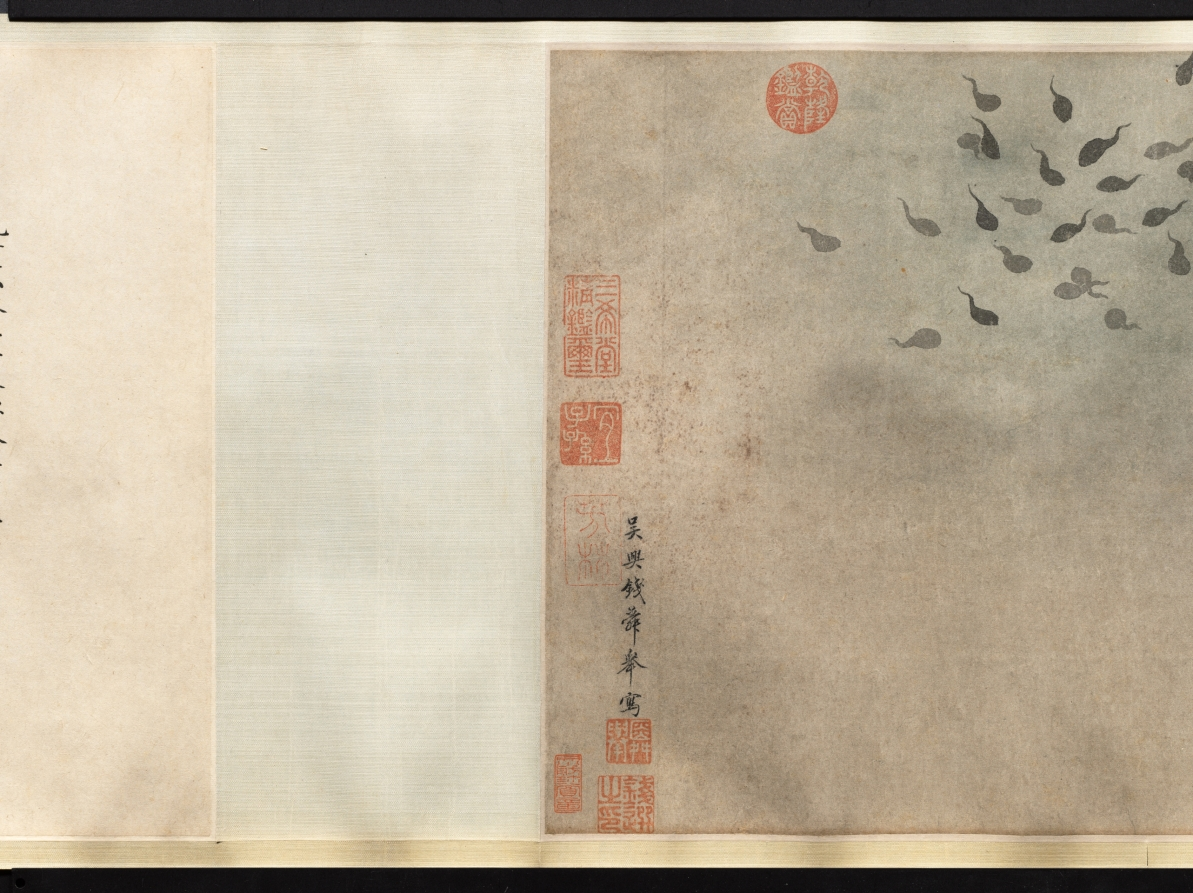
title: Insects and Flowers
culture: China, Qing dynasty (1644-1911) or Republican period (1912-49)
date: c. 1900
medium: Handscroll, ink and color on paper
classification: Painting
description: More than 26 feet long, this scroll presents insects, reptiles, and plants in delicate brushwork and pale colors, referring in style to earlier Southern Song dynasty (1127–1279) bird-and-flower paintings. Upon closer inspection, ants dismember a butterfly and reptiles wait to ambush their prey. An inscription at the end of the painting gives us an idea of its meaning: Attributed to the Qing dynasty scholar Zhang Xigeng (張錫庚, 1801–1861), the inscriber relates the work to an earlier painting by Qian Xuan (錢選, c. 1235–before 1307) and further suggests that the painting may allude to the relentlessness of natural selection. By drawing a parallel to tumultuous episodes in Chinese history, the writer might even hint at the domestic rebellions and the aggression of Western powers against China in his lifetime, particularly the Opium Wars (1839–60).